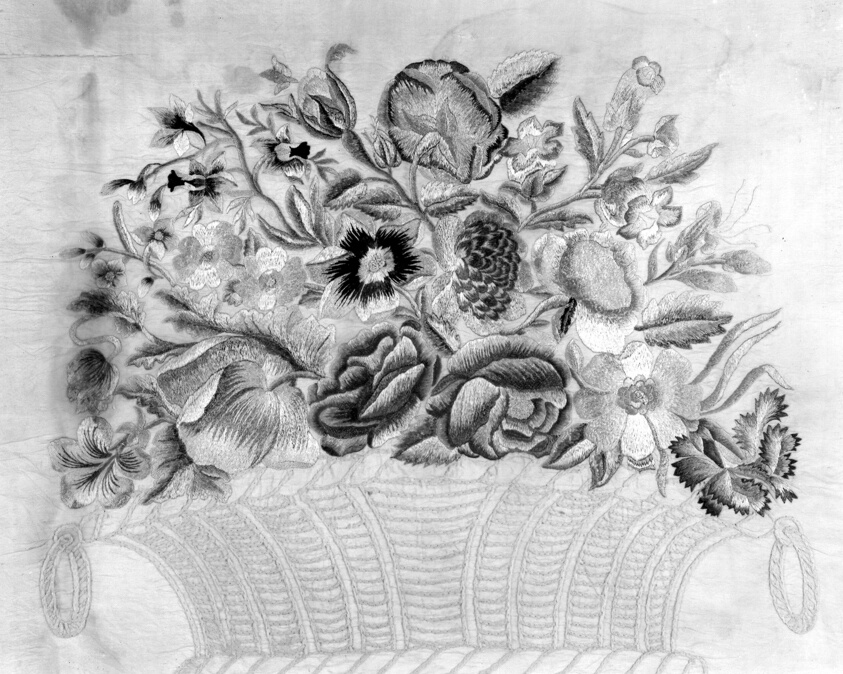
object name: Textile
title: Picture (Needlepoint)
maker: France or England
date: 18th century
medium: Silk, plain weave; embroidered with silk threads in satin and chain stitch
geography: France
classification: textile; needlework (visual works)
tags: floral arrangements